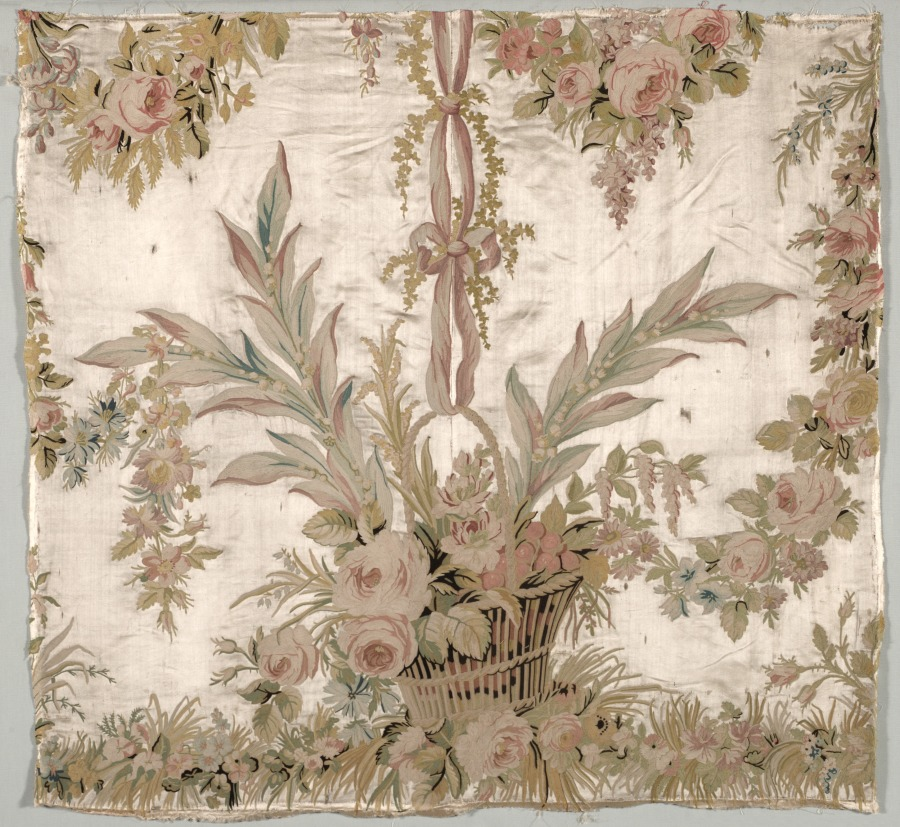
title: Coverlet and Fragments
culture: France, 18th Century, period of Louis XVI (1774-1793)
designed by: Philippe de Lasalle (French, 1723–1805)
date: c. 1760–1770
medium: embroidered satin and silk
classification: Textile